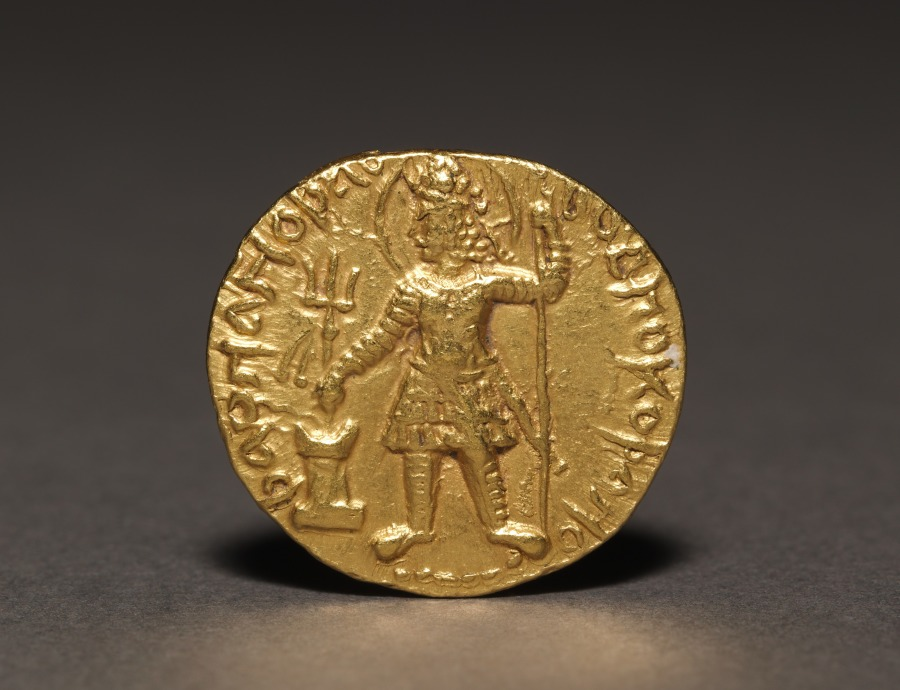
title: Coin of Kushan King Vasudeva I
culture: India, Mathura, Kushan period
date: c. 142/145+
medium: gold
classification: Coins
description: This gold coin represents the reign of the Kushana ruler, Vasudeva I. The coin bears a portrait of the ruler on the obverse and various deities on the reverse. It is identified by inscriptions in Kharosthi, the language used in northwestern India during the Kushan period.